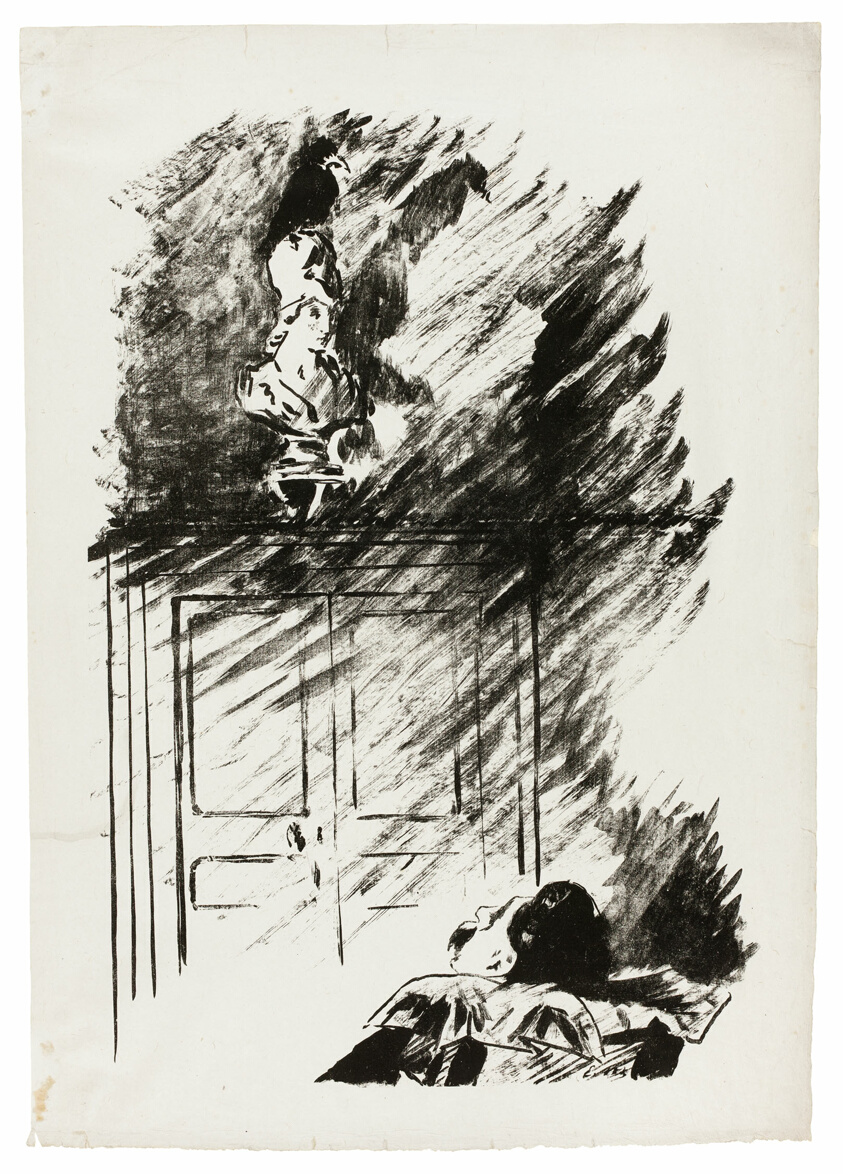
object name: Print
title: The Raven on the Bust of Pallas ("Perched upon a bust of Pallas..."), from The Raven (Le Corbeau)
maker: Édouard Manet (French, 1832-1883); written by Edgar Allan Poe (American, 1809-1849); translated and produced by Stéphane Mallarmé (French, 1842-1898); printed by Lefman et Cie. (French, 19th century); published by Richard Lesclide (French, 1825-1892)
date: 1875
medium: Transfer lithograph in black on gray China paper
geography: France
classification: gillotage; print; prints and drawing